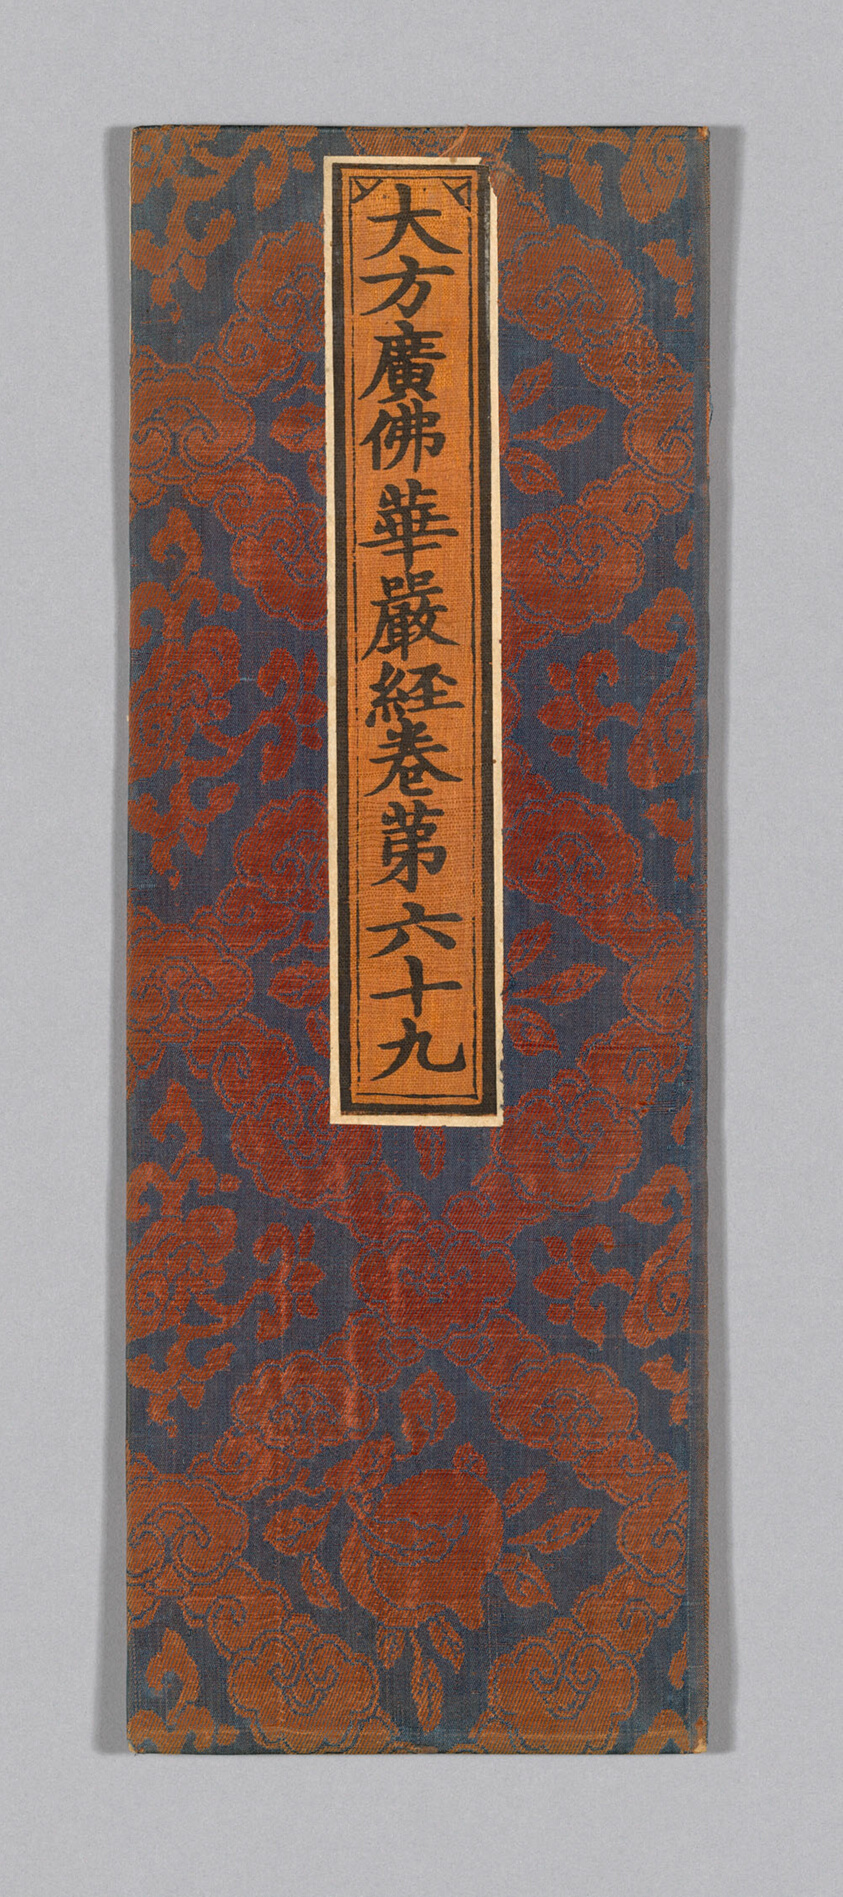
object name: Textile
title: Sutra Cover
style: ming, Chinese (culture or style), East Asian, asian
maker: China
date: Ming dynasty (1368–1644), c. 1590's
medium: Silk, twill weave self-patterned by areas of twill weave; wrapped over cardboard and backed with paper; applied label of silk, plain weave; with inscribed title painted and/or printed with ink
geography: China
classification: textile; weaving